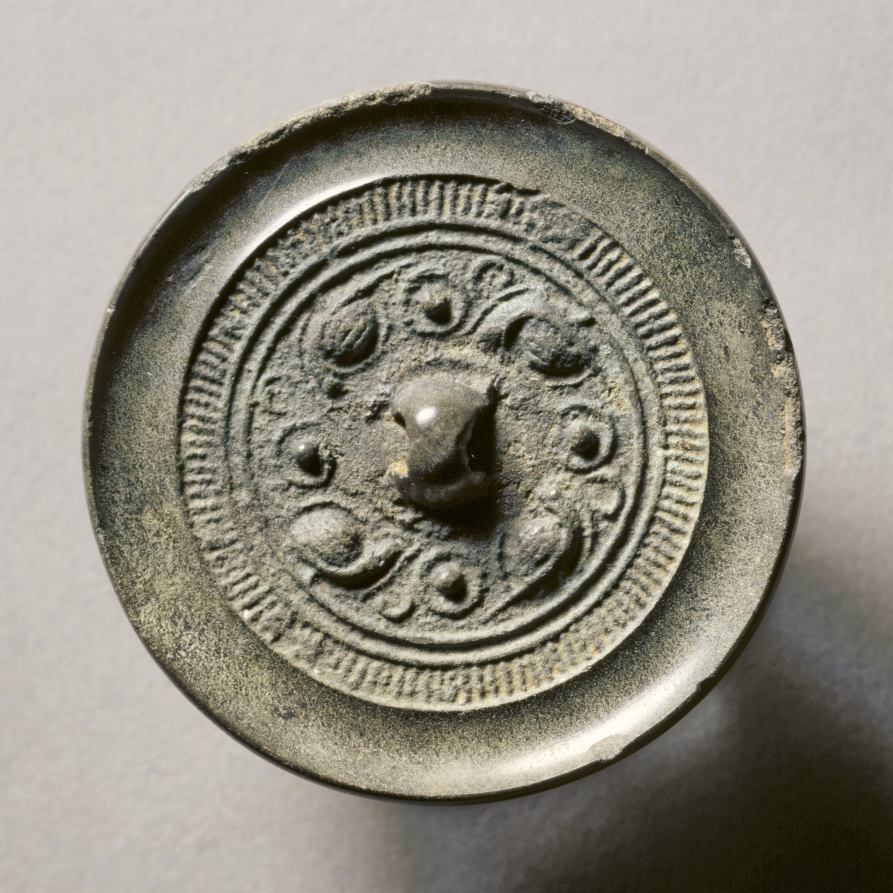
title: Mirror with Four Nipples and Four Birds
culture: China, Western Han dynasty (206 BCE–8 CE)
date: 206 BCE–9 CE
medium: bronze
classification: Metalwork